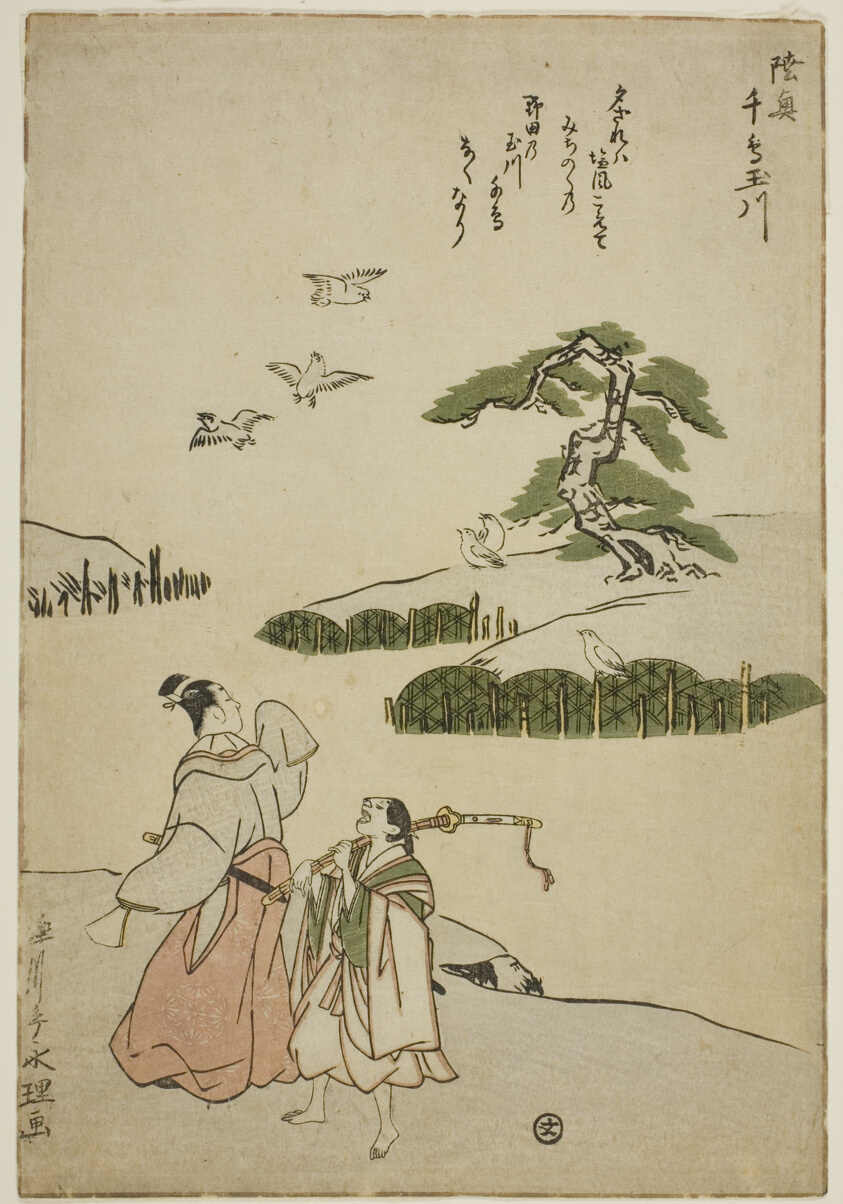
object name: Print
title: The Jewel River of Plovers in Mutsu Province (Mutsu Chidori no Tamagawa), from an untitled series of Six Jewel Rivers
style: Japanese (culture or style)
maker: Rekisentei Eiri (Japanese, active c. 1781–1818)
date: c. 1785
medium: Color woodblock print; aiban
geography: Japan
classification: woodblock print; print; asian art